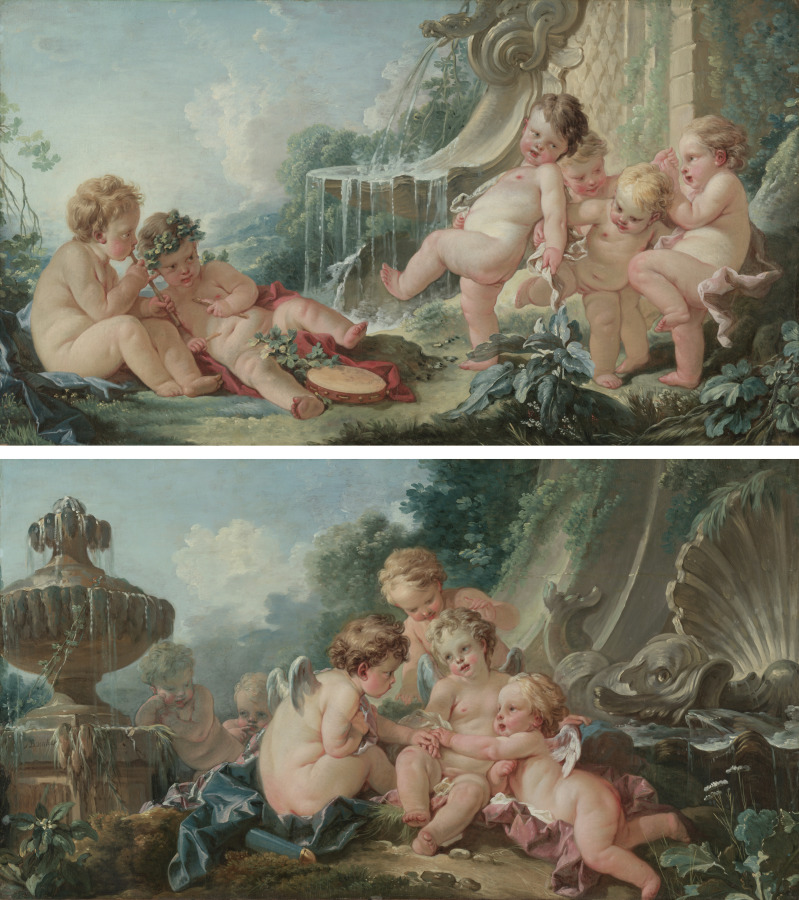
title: Music and Dance and Cupids in Conspiracy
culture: France, 18th century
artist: François Boucher (French, 1703–1770)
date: 1740s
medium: oil on canvas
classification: Painting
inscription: Signed lower left: "f Boucher"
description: Along with Cupids in Conspiracy (1948.181.2), this work is surely part of a series of over-door paintings that would have been installed in a house. However, where the panels were originally installed or who commissioned them remains unknown. They exemplify the fusion of fine arts and decorative arts that was common in elite interior design in 18th-century France. Even though the paintings were part of the wall decoration of the room, the patrons chose François Boucher, a well-known painter of portraits and genre scenes, as well as mythological and religious subjects, to execute them. These two paintings reflect a style that was popular both at court and among other wealthy patrons through much of the eighteenth century: light, charming, pastoral scenes that mix classical elements with pure fantasy. Both of them feature putti, chubby baby characters that add a touch of humor to the images.